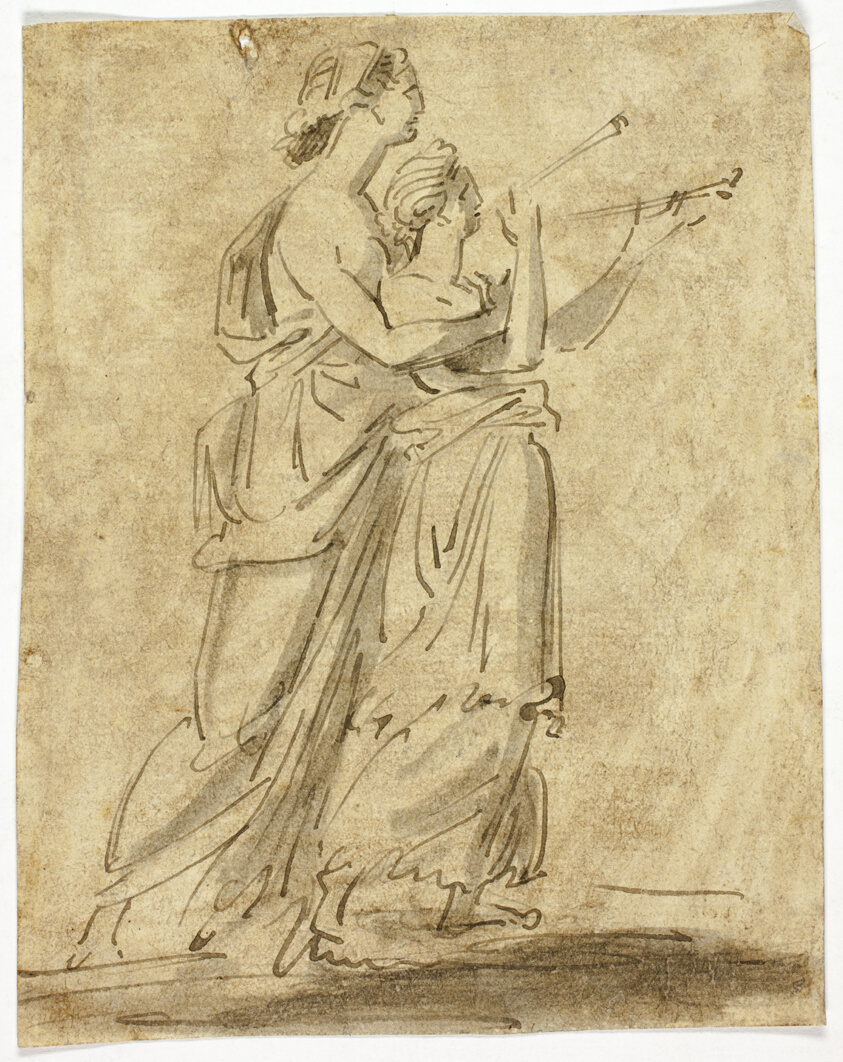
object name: Drawing and Watercolor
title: Two Classical Female Figures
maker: Unknown Artist; French, 19th century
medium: Pen and brown ink, with brush and gray wash, on brown tinted laid paper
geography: France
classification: pen and ink drawings; drawings (visual works); prints and drawing